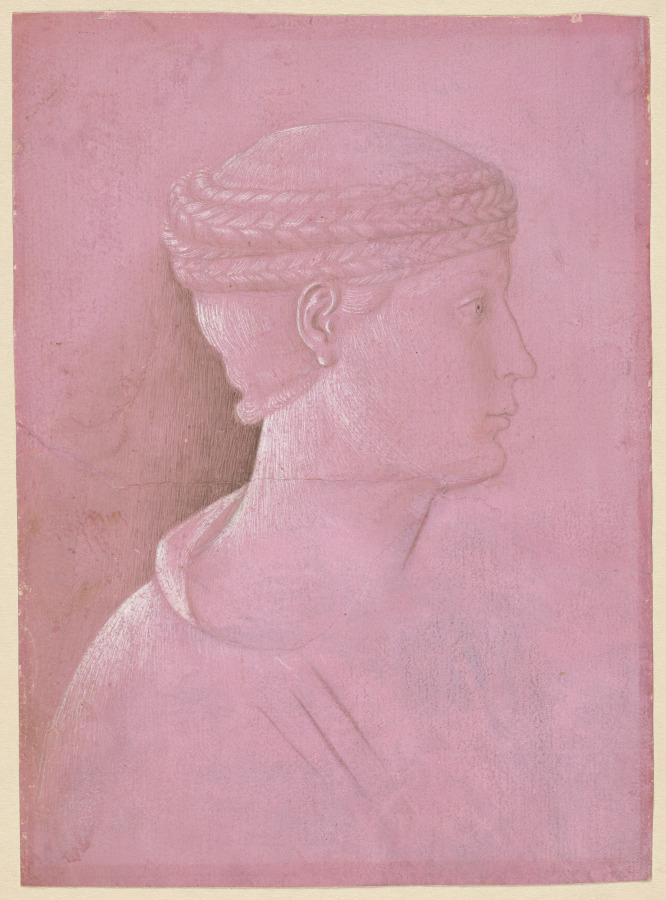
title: Bust of a Woman (recto)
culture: Italy, 15th century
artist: Benozzo Gozzoli (Italian, 1420–1497)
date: c. 1458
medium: metalpoint with point of brush and brown ink heightened with white gouache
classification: Drawing